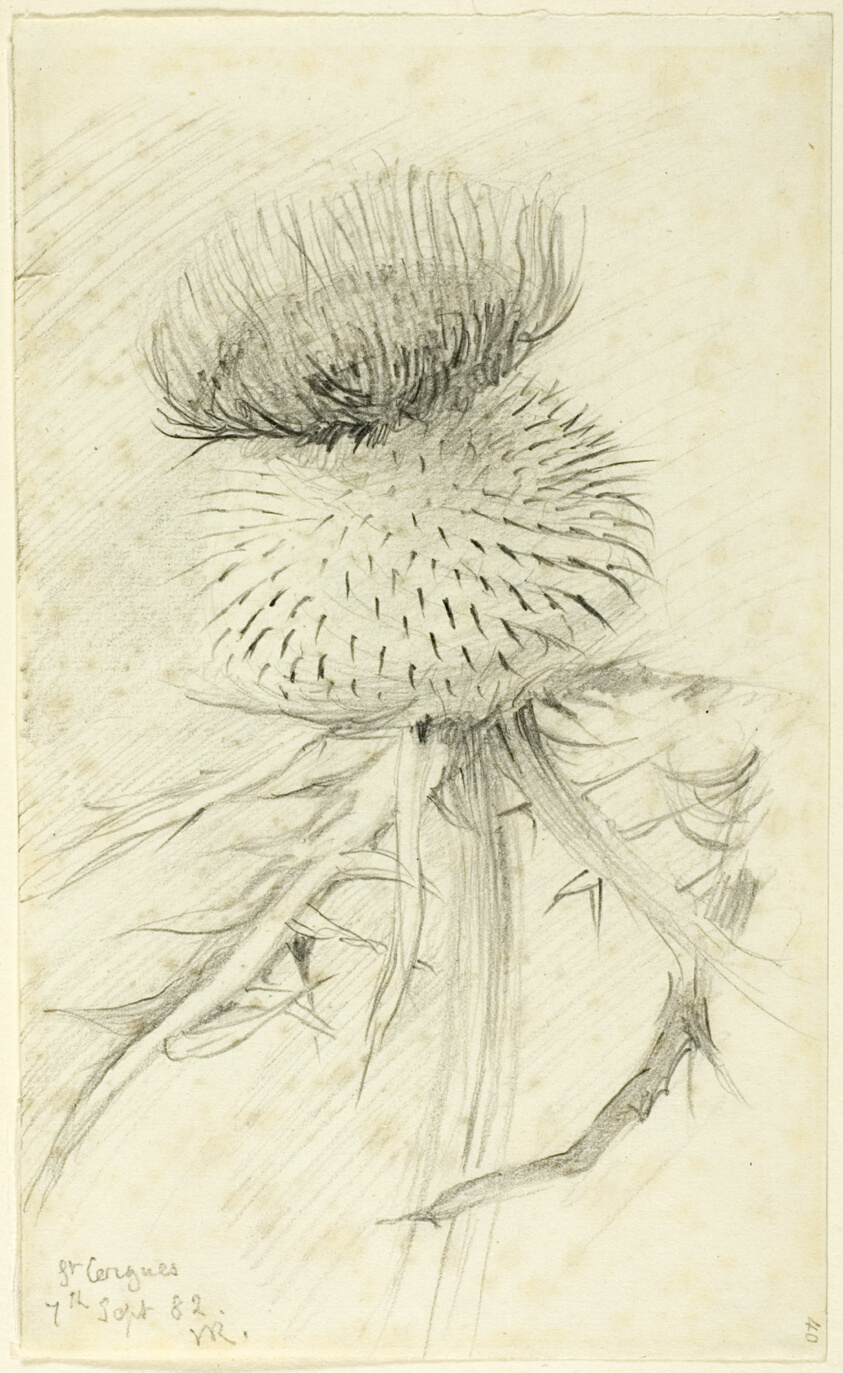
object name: Drawing and Watercolor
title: St. Cergues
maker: John Ruskin (English, 1819-1900)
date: 1882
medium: Graphite on ivory wove paper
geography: England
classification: graphite; drawings (visual works); prints and drawing